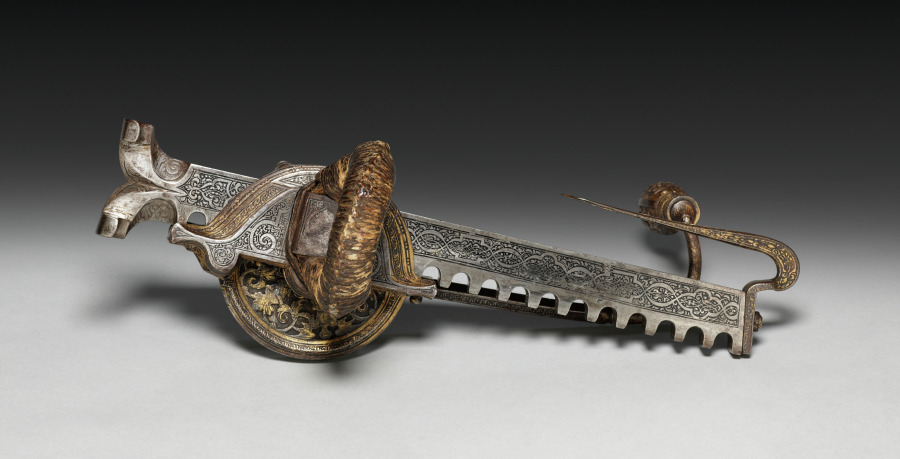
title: Cranequin with Arms of Elector Augustus I of Saxony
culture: Germany, Saxony, 16th century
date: c. 1553–73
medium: steel; etched, chased and gilded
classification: Arms and Armor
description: This winder or cranequin was for Prince Elector Augustus I, a member of the ruling elite in the Holy Roman Empire. Augustus, powerful and wealthy, had even the most practical instruments ornately decorated, including this cranequin.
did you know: Augustus was a marksman who took part in crossbow competitions. He had a large collection and often gave them to friends.